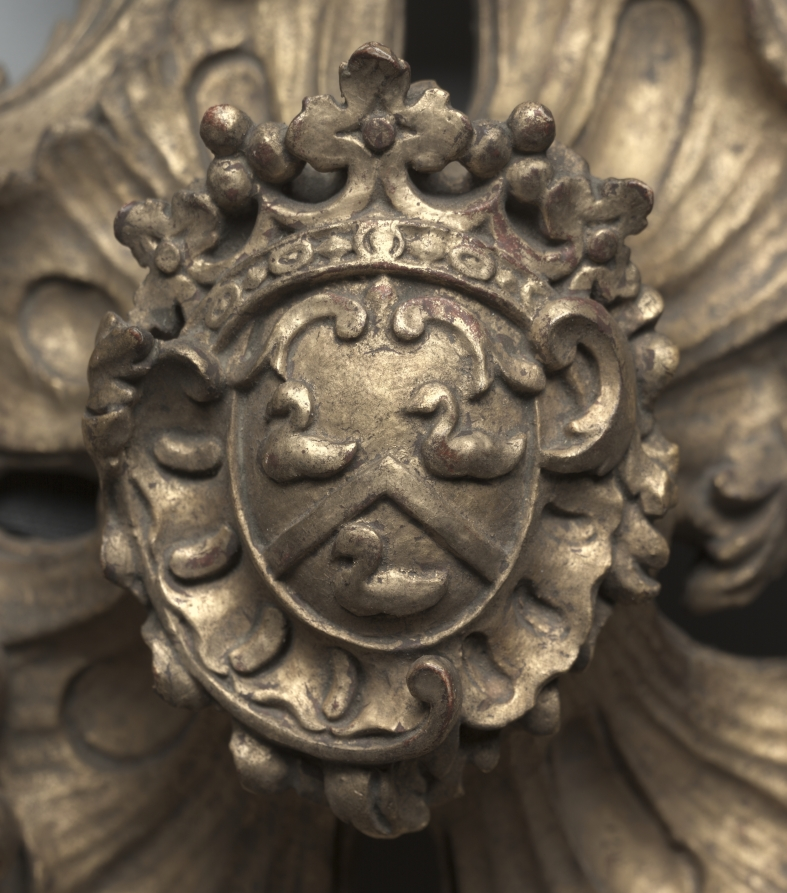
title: Wall Decoration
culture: France, Regency Period, 18th Century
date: 1715–1725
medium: wood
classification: Furniture and woodwork